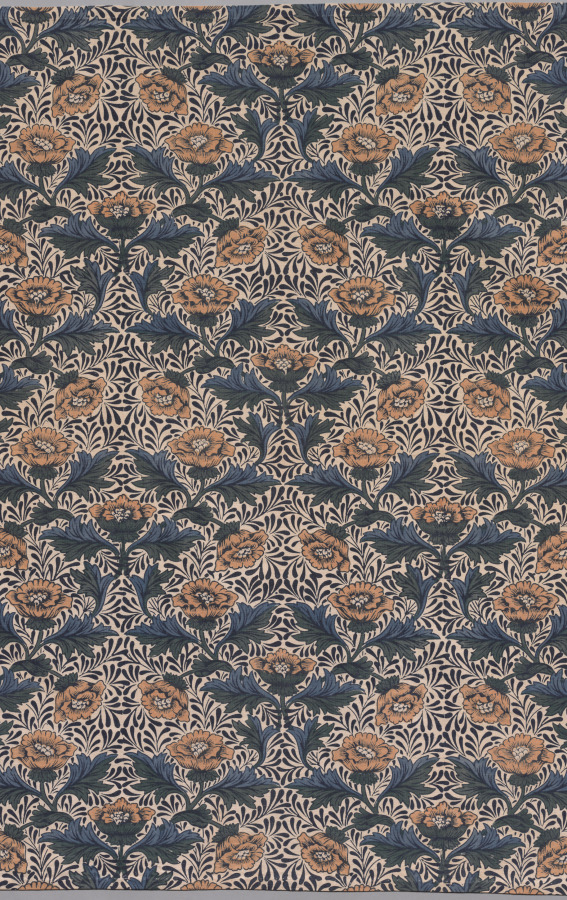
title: Peony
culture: England, 20th century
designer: Kate Faulkner (British, 1841–1898)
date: 1920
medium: plain weave cotton, printed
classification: Textile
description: Peony was probably designed for Morris & Co. by Kate Faulkner, the sister of William Morris’s early business partner Charles Faulkner. The small, almost square repeat of this pattern is more characteristic of Kate than of Morris, who favored larger patterns. She also designed embroidery, wallpaper, painted tiles and pottery, and plaster decoration for the firm. Morris had a progressive attitude toward women as co-laborers, and promoted the work of designers such as Kate, whose patterns challenged the monotony of much of the needlework and domestic crafts that then occupied middle-class women.